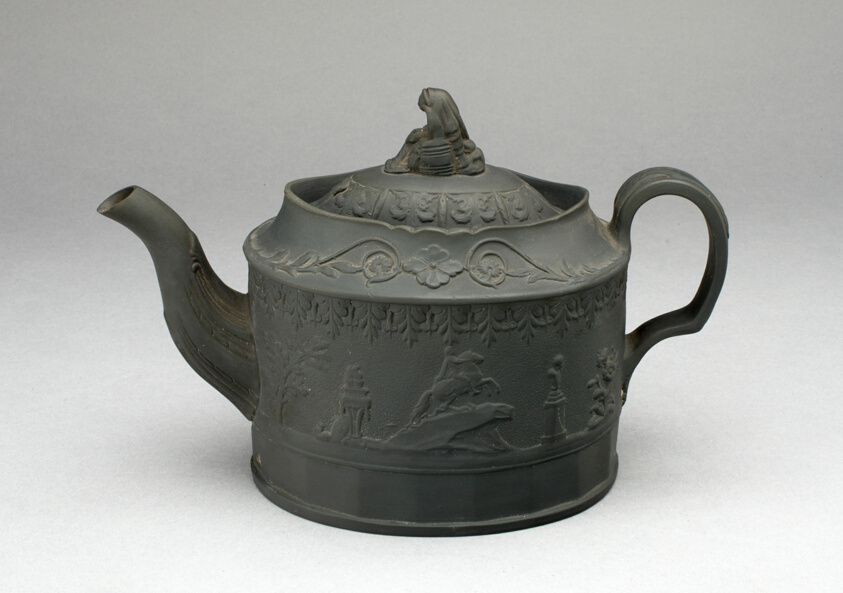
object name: Ceramics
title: Teapot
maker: Wedgwood Manufactory (England, founded 1759)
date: c. 1800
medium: Stoneware (basaltware)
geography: Burslem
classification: teapot; teaware; stoneware; european decorative arts; ceramics